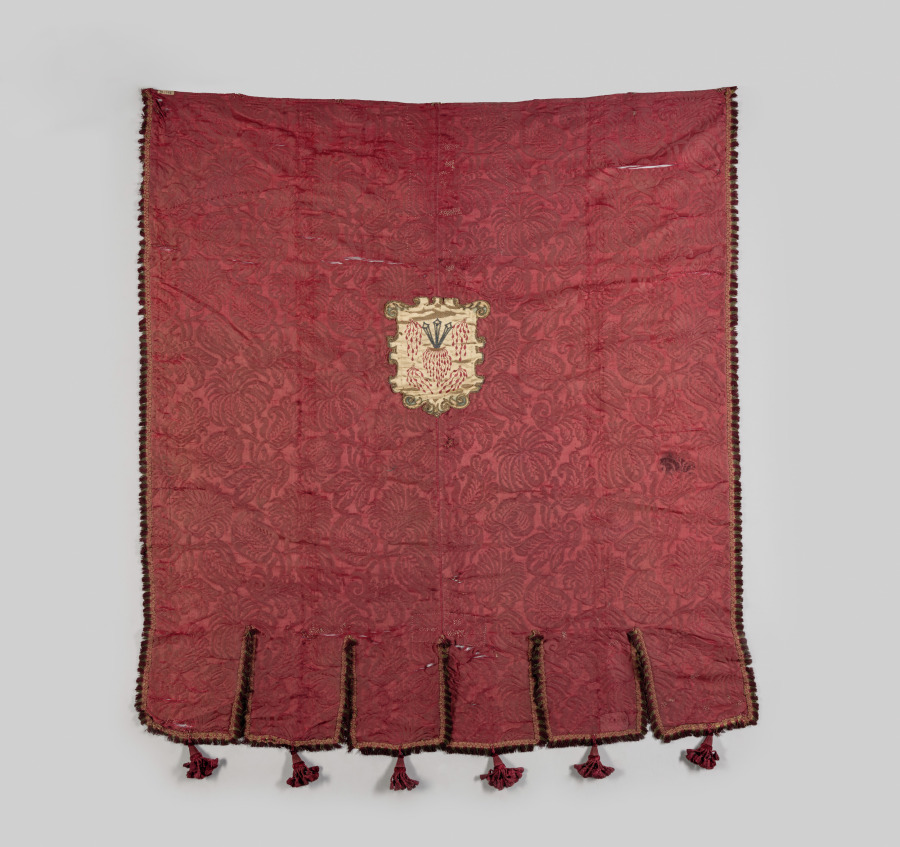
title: Banner with Medallions of Christ's Passion (banner)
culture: Spain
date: 1700s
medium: crimson silk brocade; satin; scalloped border with fringe and tassels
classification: Textile